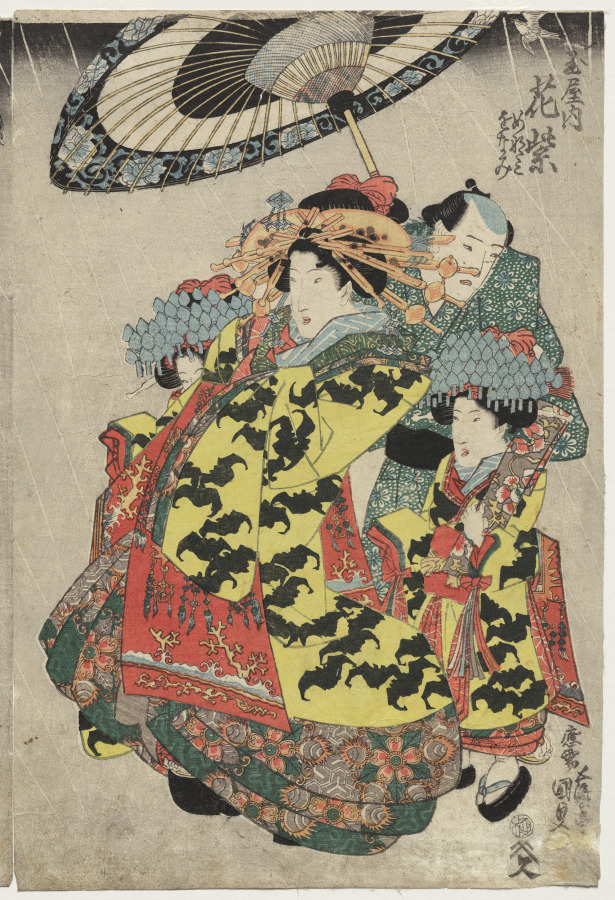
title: The Courtesans Hanamurasaki and Koshikibu of the Tamaya Promenading in the Rain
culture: Japan, Edo period (1615–1868)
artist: Utagawa Kunisada (Japanese, 1786–1865)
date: c. early 1830s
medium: color woodblock print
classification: Print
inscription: Artist's signature: Gototei Kunisada ga.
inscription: Publisher: Yamamotoya Heikichi (emblem). Censorship seal: kiwame.